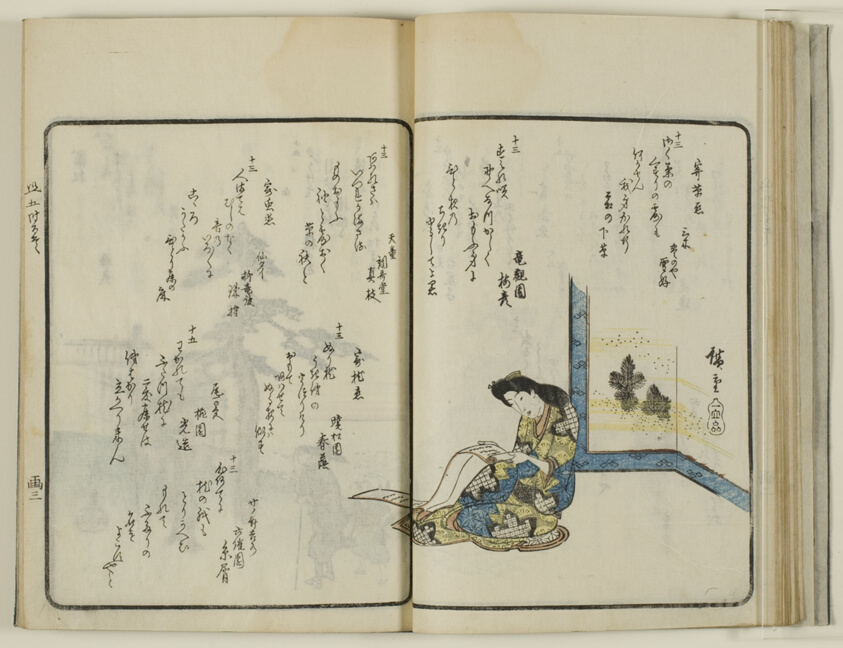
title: Kyoka sokon shun goji hyakushu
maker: Utagawa Hiroshige (1760-1849); Japanese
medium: Woodblock printed book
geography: Japan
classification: book; asian art